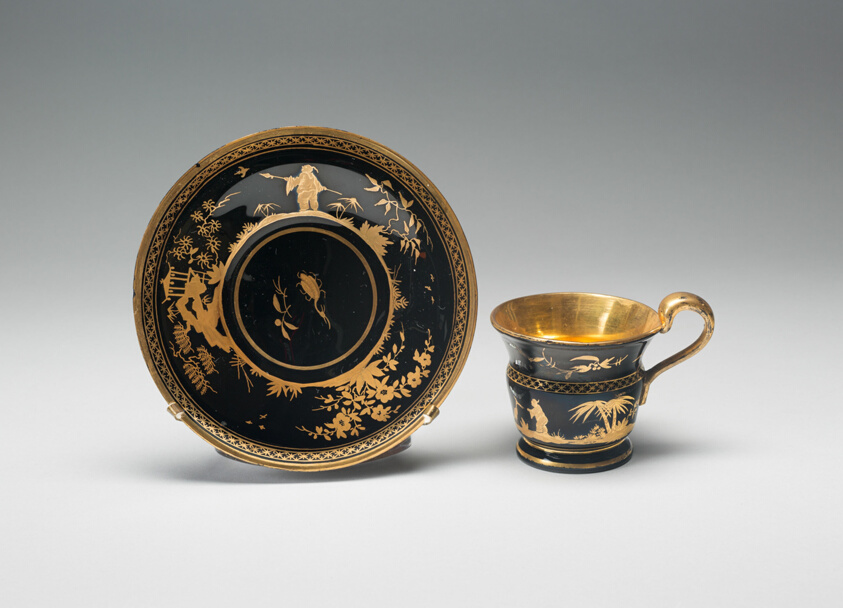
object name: Glass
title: Cup and Saucer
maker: Bohemia, Czech Republic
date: c. 1825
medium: Glass; black, blown and gilded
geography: Bohemia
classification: drinking vessel; glass; european decorative arts